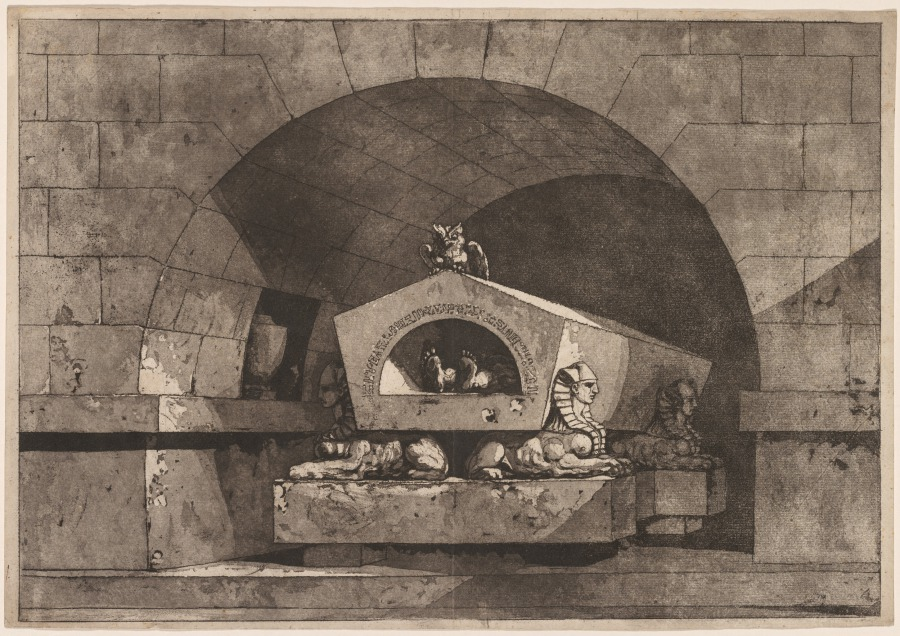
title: Tomb with Sphinxes and an Owl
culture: France, 18th century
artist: Louis Jean Desprez (French, 1743–1804)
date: c. 1779–84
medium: aquatint with etching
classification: Print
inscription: inscribed in graphite on verso: 1881 / 10; watermark and countermark: fleur de lis enclosed in a circle, (right side of sheet); VM’TORJ, (est.), (left side of the sheet)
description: Originally trained as an architect, Louis Jean Desprez produced this print depicting a tomb while living in Rome. He combined details observed while visiting catacombs in southern Italy with macabre inventions, such as the pair of feet visible from within the sculptural space. Desprez creatively used aquatint—a printmaking technique that produces shades of gray—to render the space’s dramatic shadows and stone surfaces.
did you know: The growing popularity of Egypt in the late 18th century, bolstered by Napoleon Bonaparte’s ultimately failed attempt to colonize the country, ensured a ready market for the subject of Louis Jean Desprez's print.